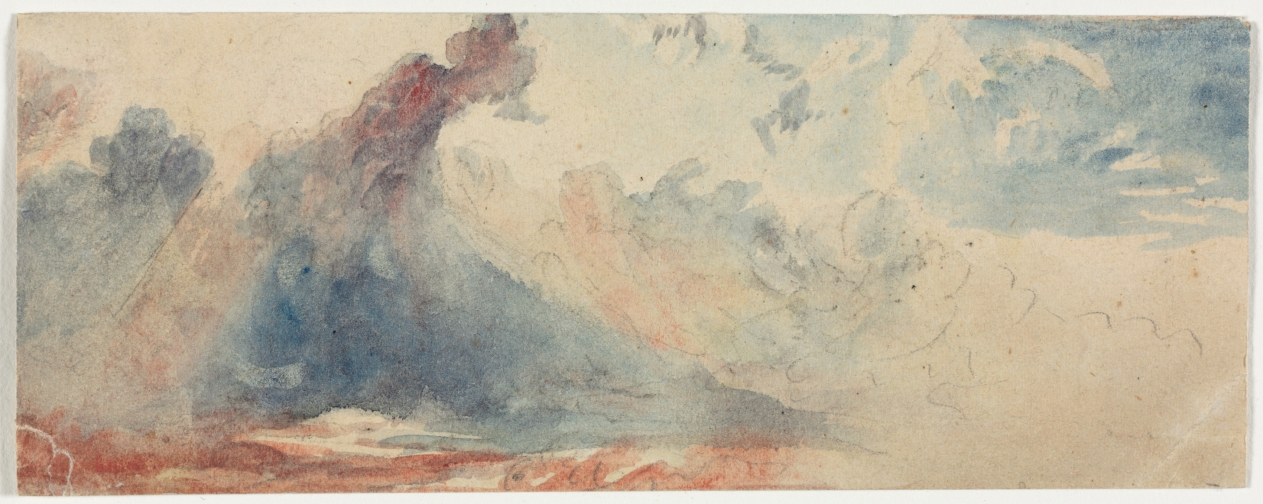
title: Cloud Study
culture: England, 19th century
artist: Anonymous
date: 1800s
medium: watercolor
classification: Drawing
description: Many English watercolorists of the period were especially interested in capturing natural effects of the landscape, such as cloud formations. Such studies were of particular interest to the French Impressionists.